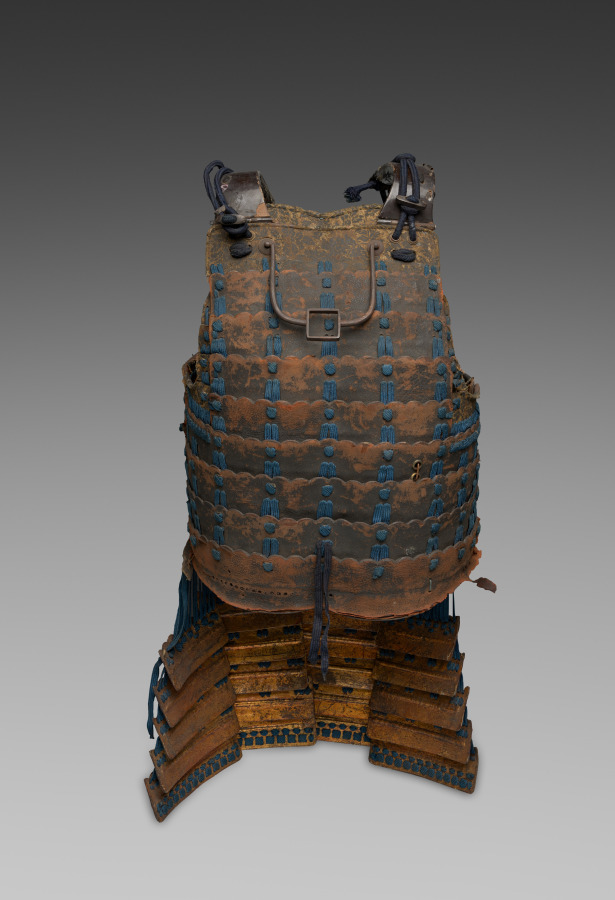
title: Cuirass (Dō)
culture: Japan, Edo period (1615–1868)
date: 1615–1868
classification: Arms and Armor